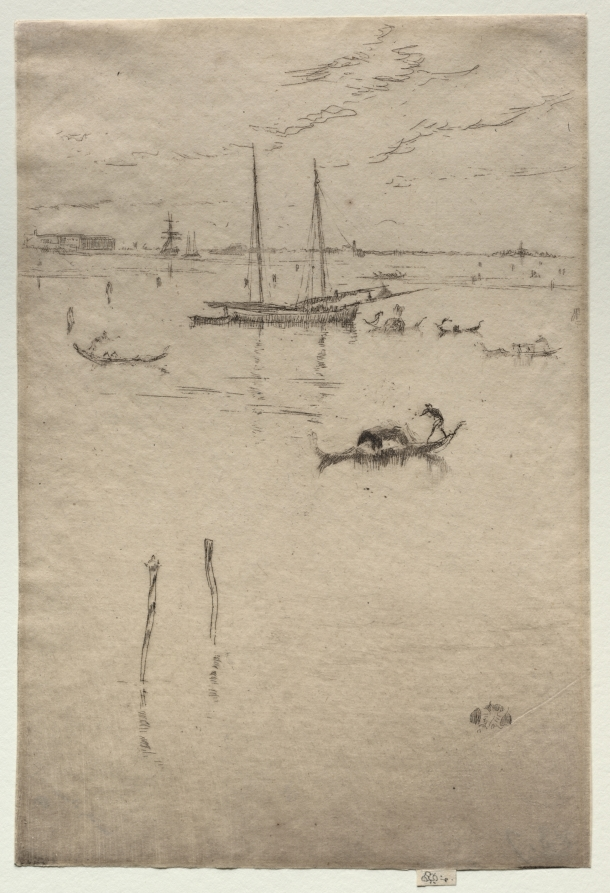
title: Little Lagoon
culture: America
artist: James McNeill Whistler (American, 1834–1903)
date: 1879–80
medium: etching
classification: Print